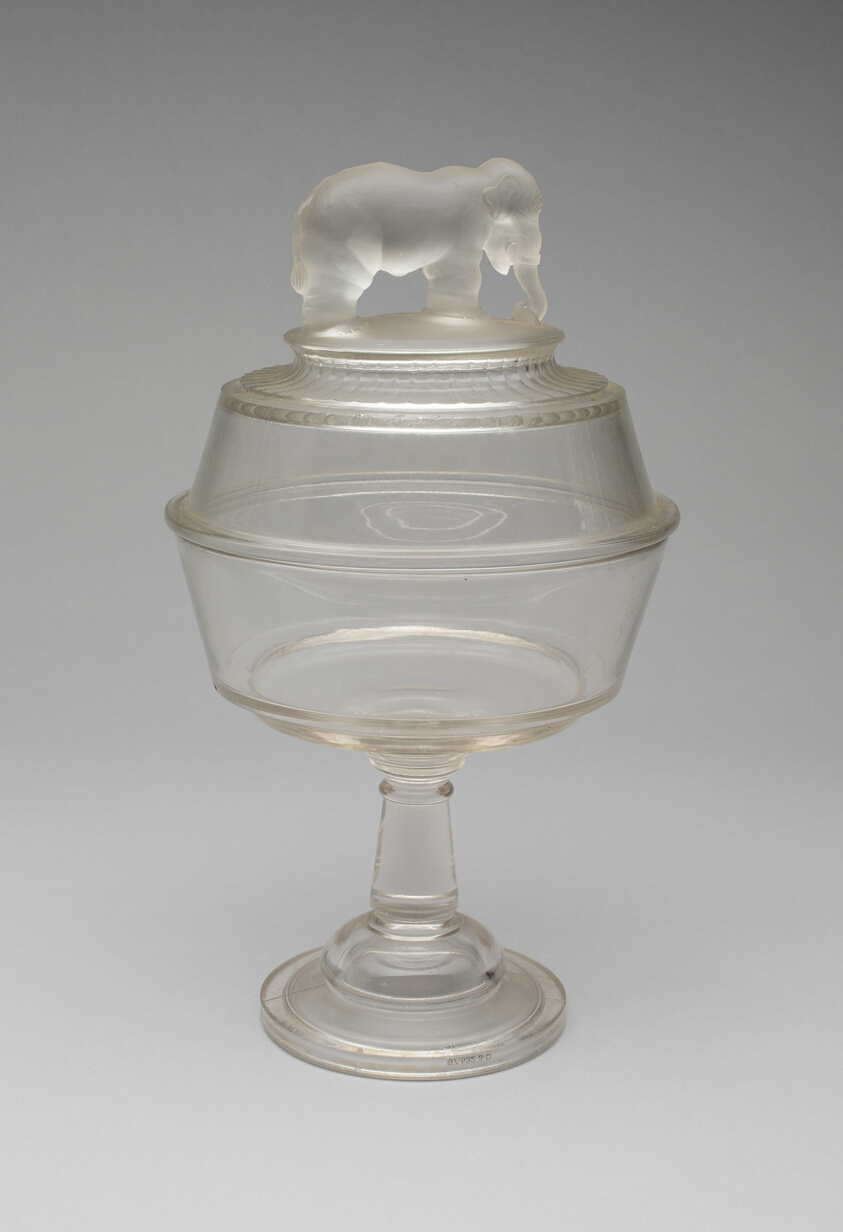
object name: Glass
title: "Jumbo"/Elephant pattern covered compote on pedestal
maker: Attributed to Canton Glass Company; Canton, Ohio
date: 1883–5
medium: Glass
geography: Canton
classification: compote; glass; vessel for serving food; american decorative arts; american arts; decorative arts